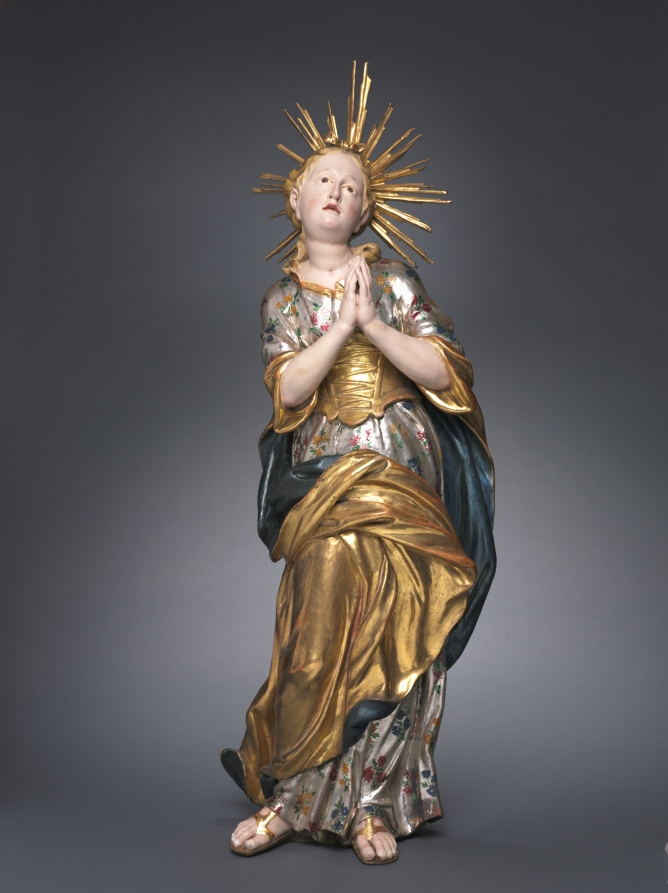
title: Virgin Mary as a Child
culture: Austria, Vienna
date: 1750–75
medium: painted and gilded wood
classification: Sculpture